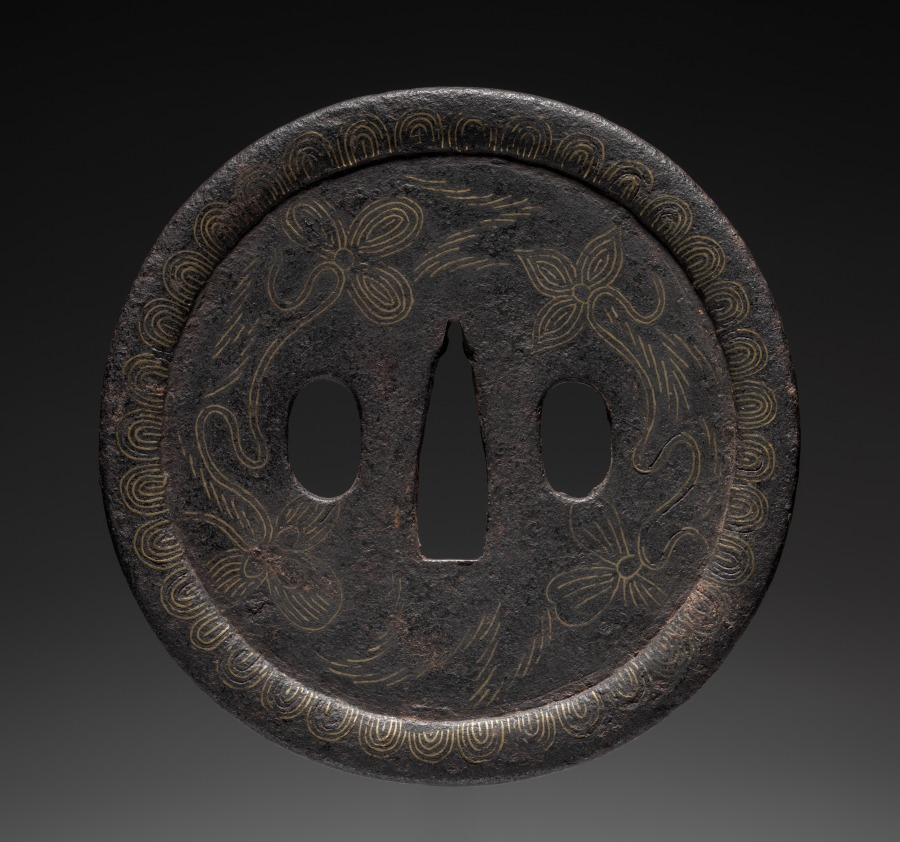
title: Sword Guard (Tsuba)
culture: Japan, possibly Edo period (1615-1868)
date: c. 1615–1868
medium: iron with brass inlay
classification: Arms and Armor